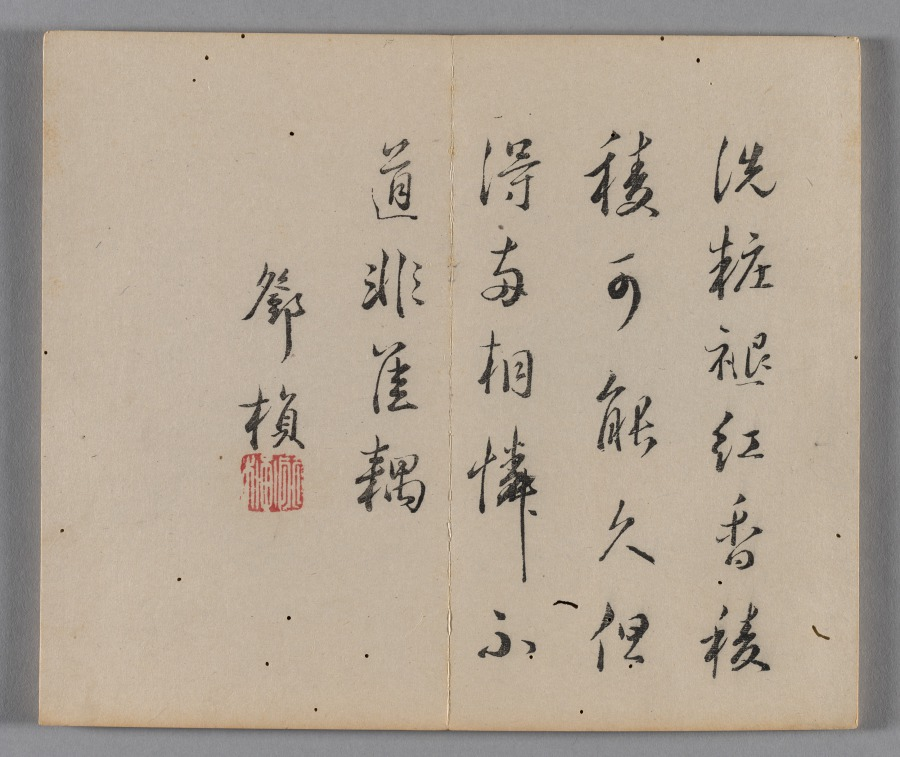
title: Ten Bamboo Studio Collection of Calligraphy and Painting: Miscellaneous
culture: China, Qing dynasty (1644-1911)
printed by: Hu Zhengyan (Chinese, c. 1584–1674)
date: 1633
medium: Woodblock-printed book; ink and colors on paper; first edition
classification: Print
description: Color printing reached a level of perfection in the early 1600s, as seen in this Ten Bamboo Studio Collection of Calligraphy and Painting and the Mustard Seed Garden Manual of Painting (printed 1679 and 1701). The painterly quality, precision in registering (aligning) the woodblocks, and harmonious colors made them the most successful color print editions in Chinese history. Both editions were printed and compiled in Nanjing, spread nationwide, and had a great impact on the arts in Japan and Korea.